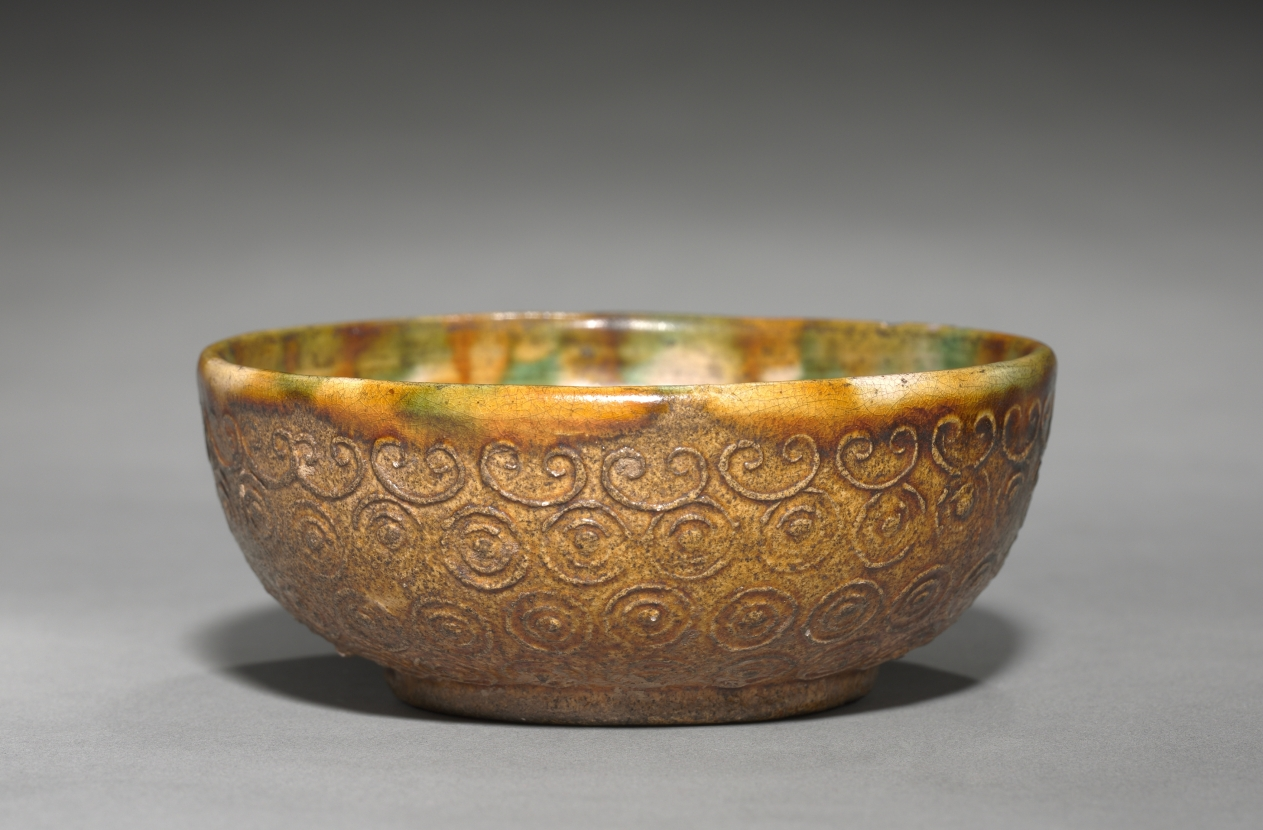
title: Bowl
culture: China, Tang dynasty (618-907)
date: 618–906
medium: glazed earthenware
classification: Ceramic